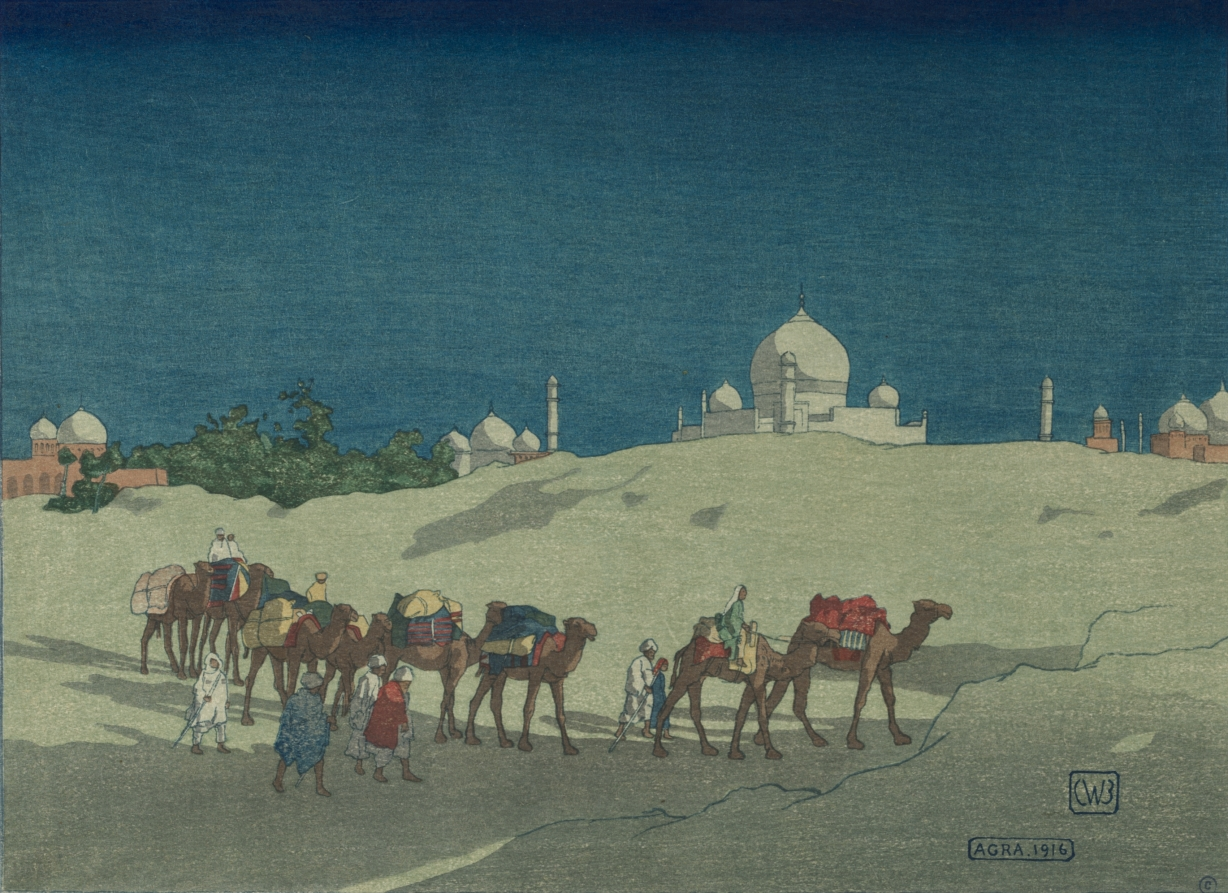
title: Agra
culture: England, 20th century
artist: Charles William Bartlett (British, 1860–1940)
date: 1916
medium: color woodcut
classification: Print